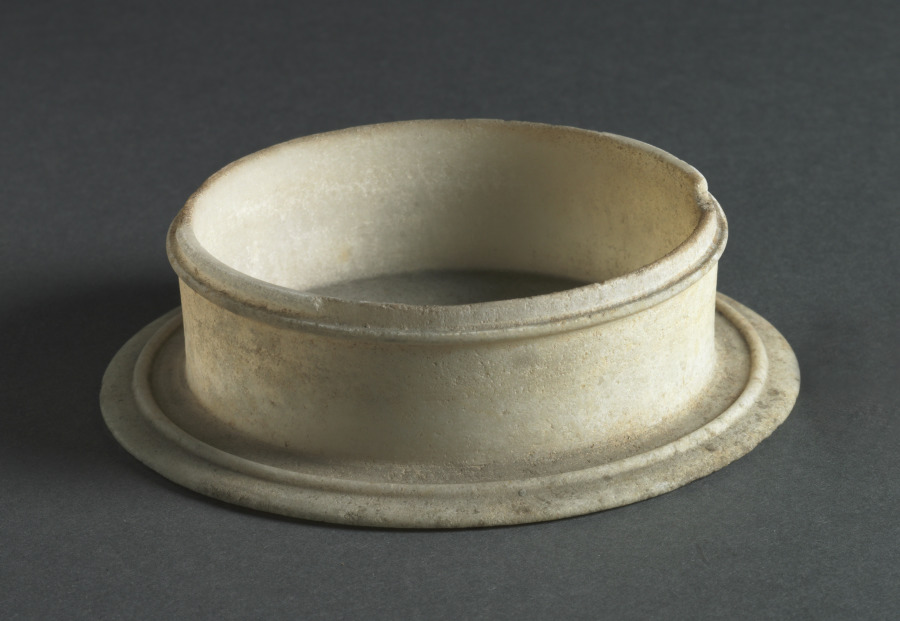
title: Pyxis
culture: Greece, Attic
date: 400–300 BCE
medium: marble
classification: Stone